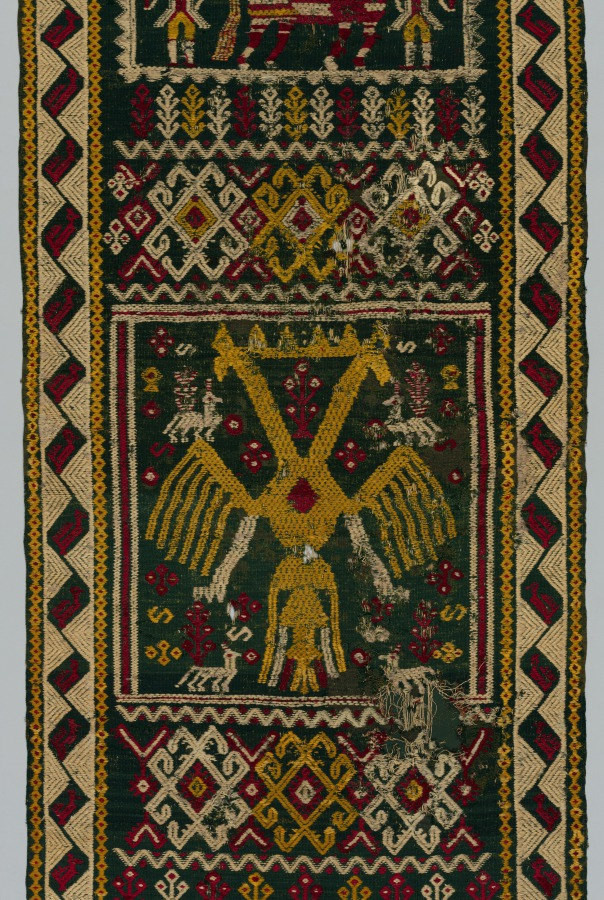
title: Woven Chest or Bed Cover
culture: Italy, Terra di Lavoro, 18th century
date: 1700s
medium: embroidery; wool on linen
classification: Textile